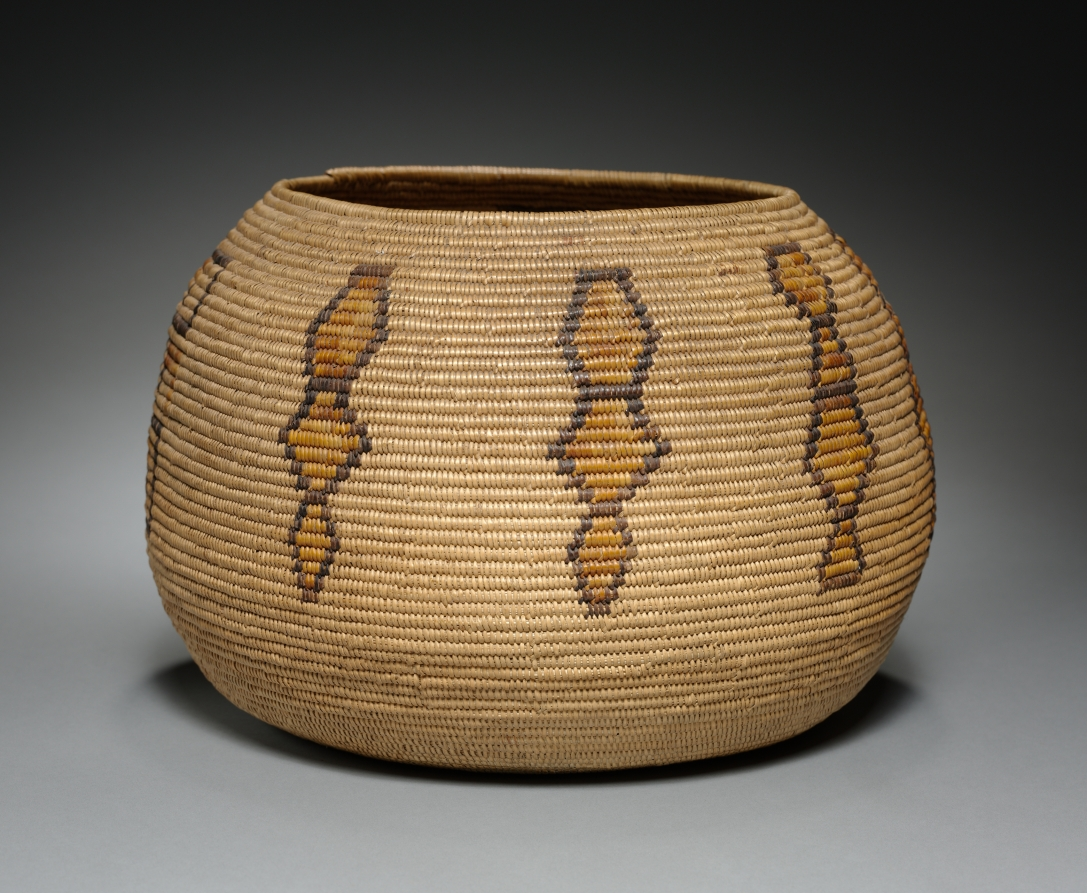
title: Gift Basket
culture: California, Cahuilla (Mission, Saboba Mission), Unassigned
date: c. 1900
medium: Juncus, sumac; coiled, deergrass bundle foundation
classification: Basketry